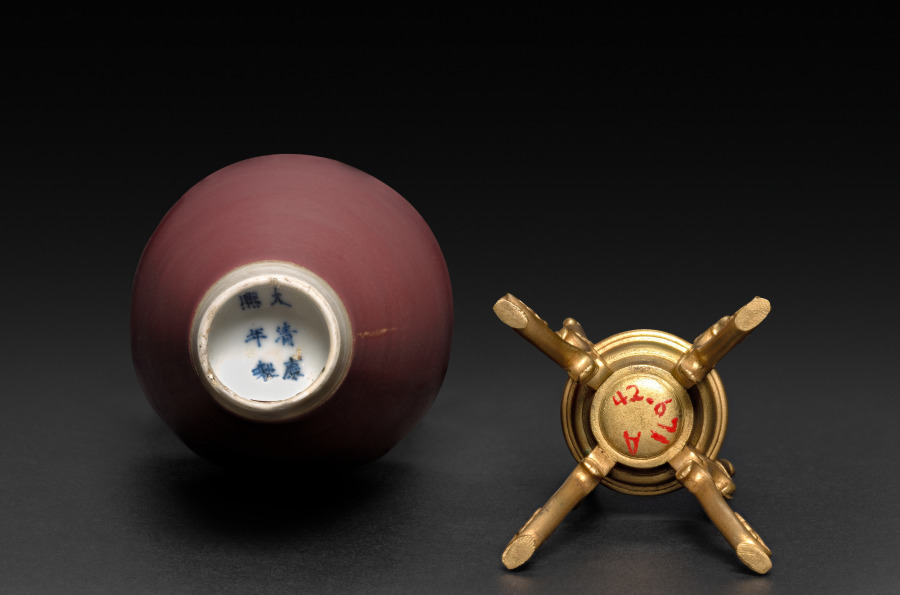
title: Bottle with Peach Bloom Glaze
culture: China, Qing dynasty (1644-1911), Kangxi reign (1661-1722)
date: 1662–1722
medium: porcelain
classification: Ceramic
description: The "peach-bloom" glaze developed during the Kangxi era has also been described as "drunken with beauty." Technical achievements were transcended with aesthetic associations, revealing the greatest sensitivity to all things beautiful in nature.